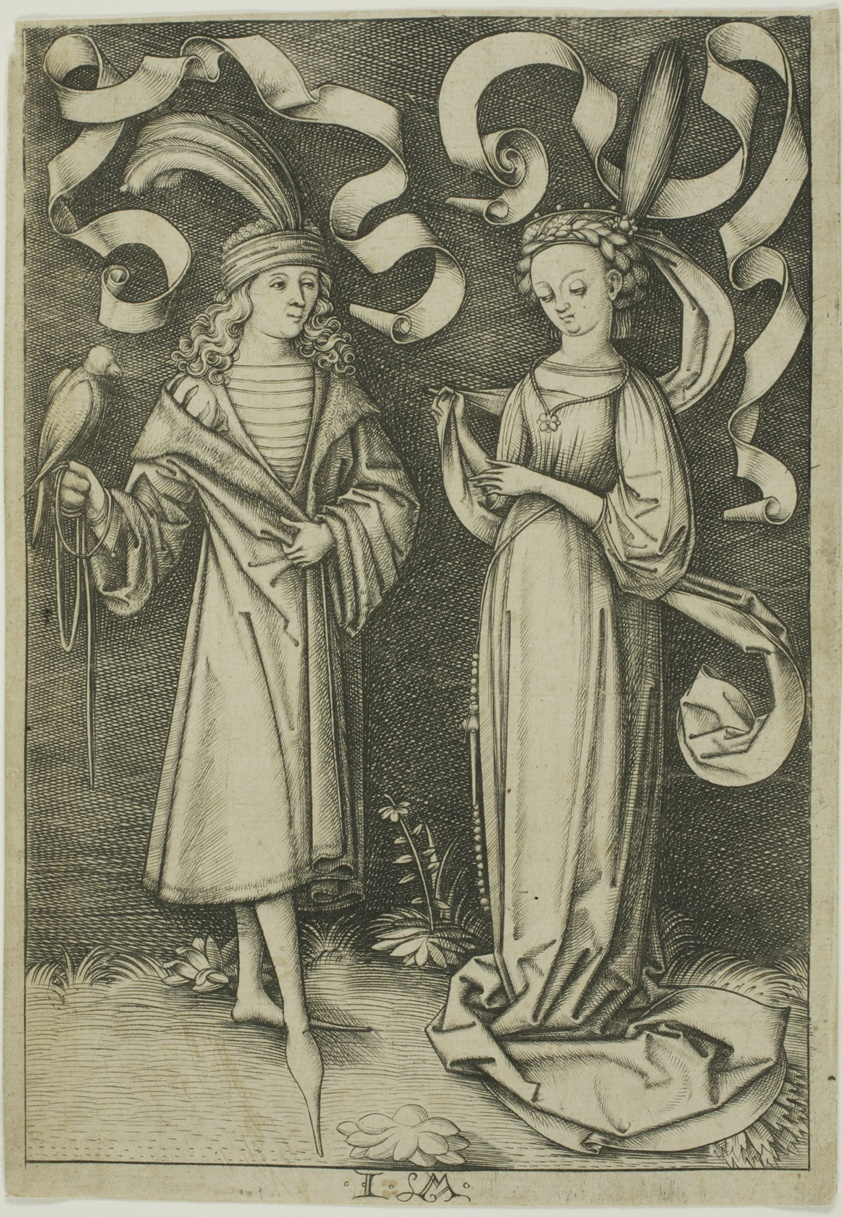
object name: Print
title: The Falconer and the Lady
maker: Israhel van Meckenem the Younger; German, c. 1440/45-1503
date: c. 1495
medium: Engraving in black on cream laid paper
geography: Germany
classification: engraving; print; prints and drawing